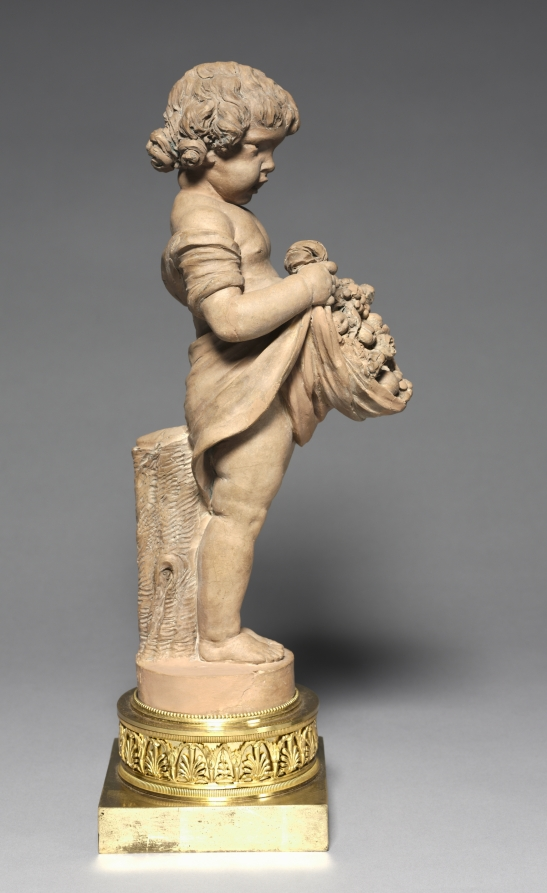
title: Child Carrying Fruit and Flowers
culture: France, 18th century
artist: Clodion (French, 1738–1814)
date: 18th-early 19th century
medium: terracotta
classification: Sculpture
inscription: Signed: "Clodion"; signature incised on back in the terracotta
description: French sculptor Claude Michel, called Clodion, frequently depicts children in his sculpture, in this case a convincing toddler, from her pout to her plump toes. The piece is constructed in terracotta, a common medium for Clodion. After firing, the unglazed color of the clay can vary widely; each of Clodion's statues has a slightly different hue. The figure has sustained a number of damages, but has recently been cleaned and repaired.